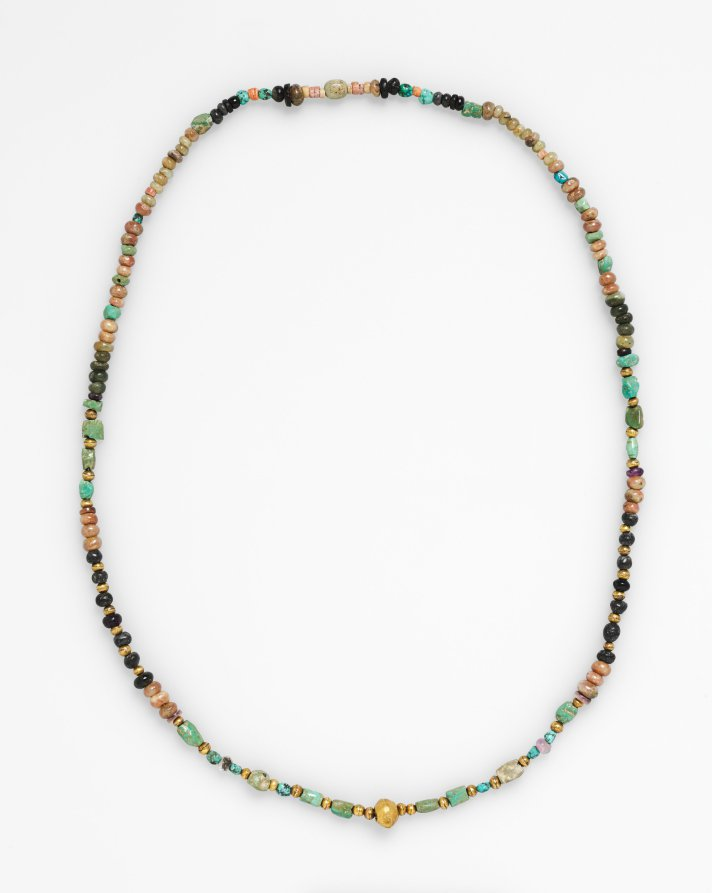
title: Necklace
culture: Peru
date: before 1532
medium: pink quartz, amethyst, gold and turquoise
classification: Jewelry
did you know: These ancient beads were restrung in modern times.